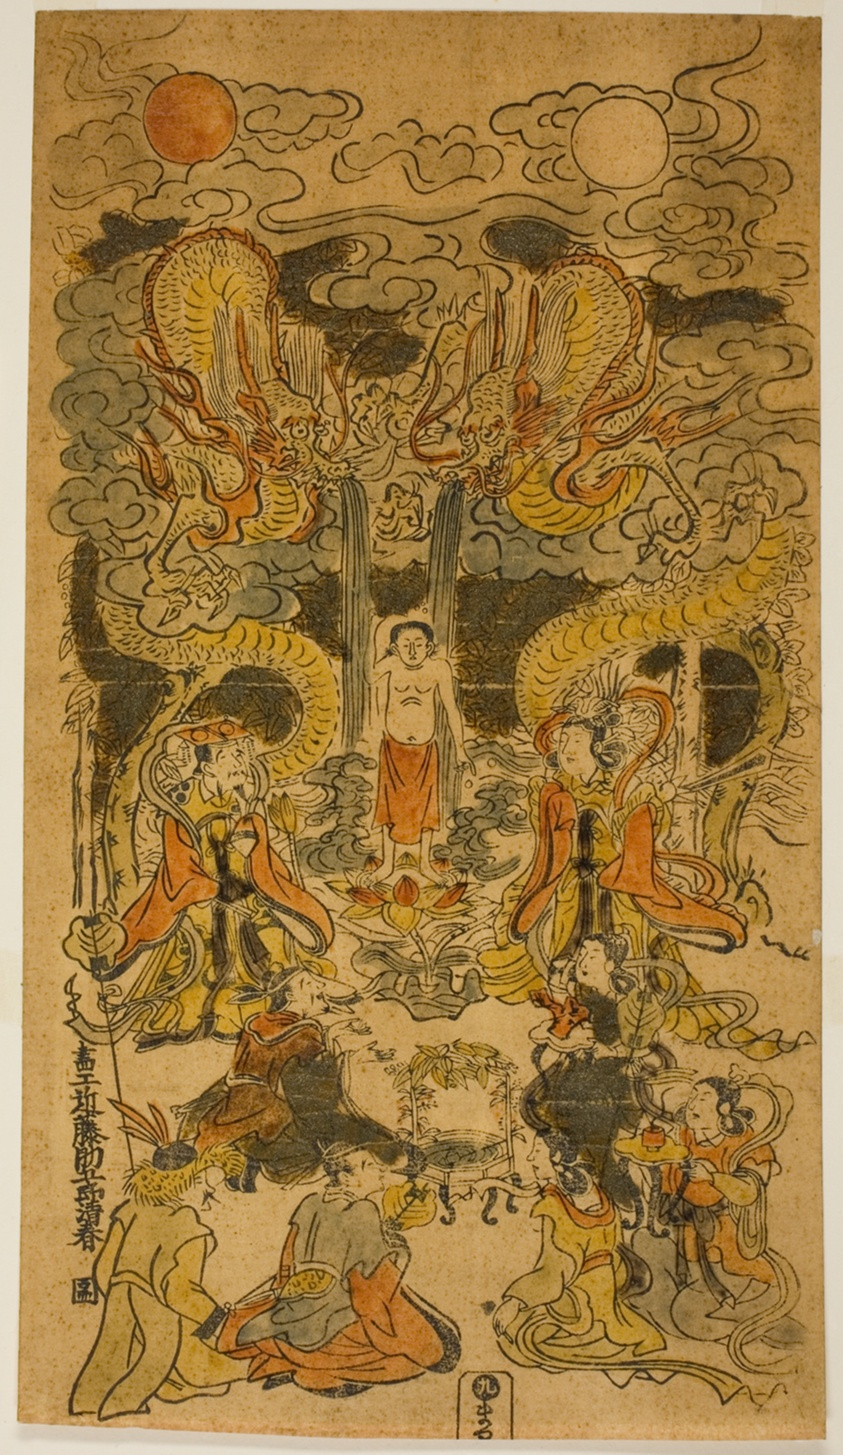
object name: Print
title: The Birth of the Buddha Sakyamuni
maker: Kondo Kiyoharu (Japanese, active about 1704-36)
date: about 1720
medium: Hand-colored woodblock print; hosoban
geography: Japan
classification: woodblock print; print; asian art